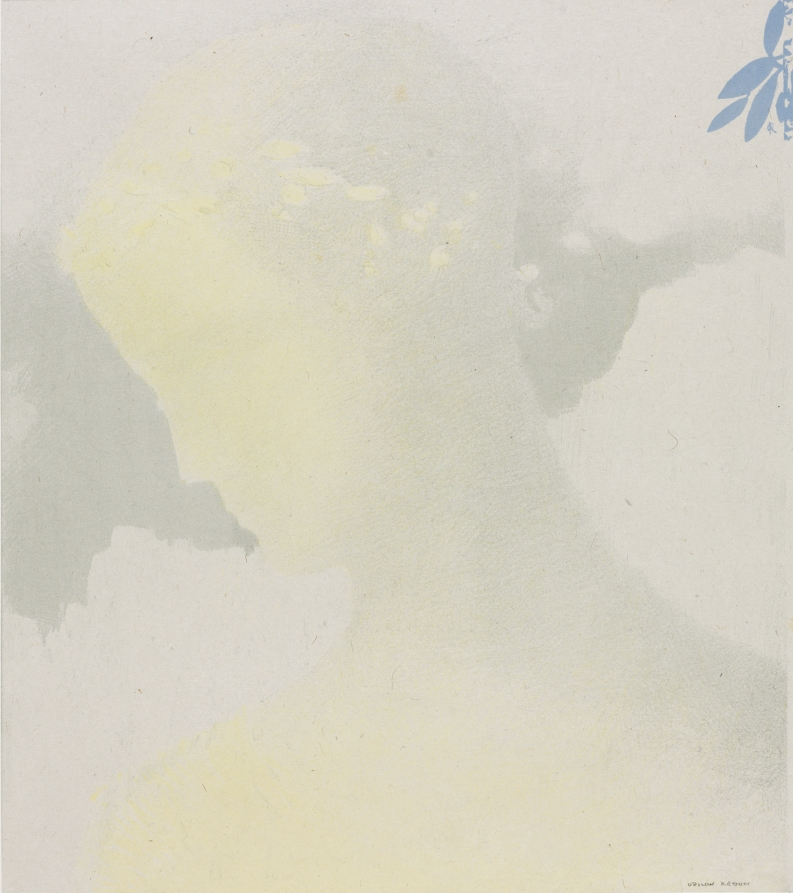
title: Beatrice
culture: France, late 19th Century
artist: Odilon Redon (French, 1840–1916)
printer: Auguste Clot (French, 1858–1936)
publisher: Ambroise Vollard (French, 1867–1939)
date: 1897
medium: color lithograph on China paper laid on wove paper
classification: Print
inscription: Signed, lower right of image, in graphite: ODILON REDON; initialed on stone, upper right corner: OR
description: This print represents Odilon Redon’s fullest experimentation with color lithography. Although he occasionally printed works in a single color, he only made one work in a full range of tones. Revisiting the subject of a pastel from about a decade earlier, Beatrice portrays a recurring figure in Redon’s work—the woman who inspired Italian poet Dante Alighieri (1265–1321). Working with his frequent collaborators during the 1890s, printer Auguste Clot and publisher Ambroise Vollard, Redon used muted shades to suggest Beatrice’s ethereal presence and her timeless role as an artistic muse.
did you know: This print was published in L'Album d'Estampes Originales, a portfolio of lithographs edited by Vollard that included works by some of the leading artists of the day including Bonnard, Cézanne, Toulouse-Lautrec, Vuillard, and Whistler.